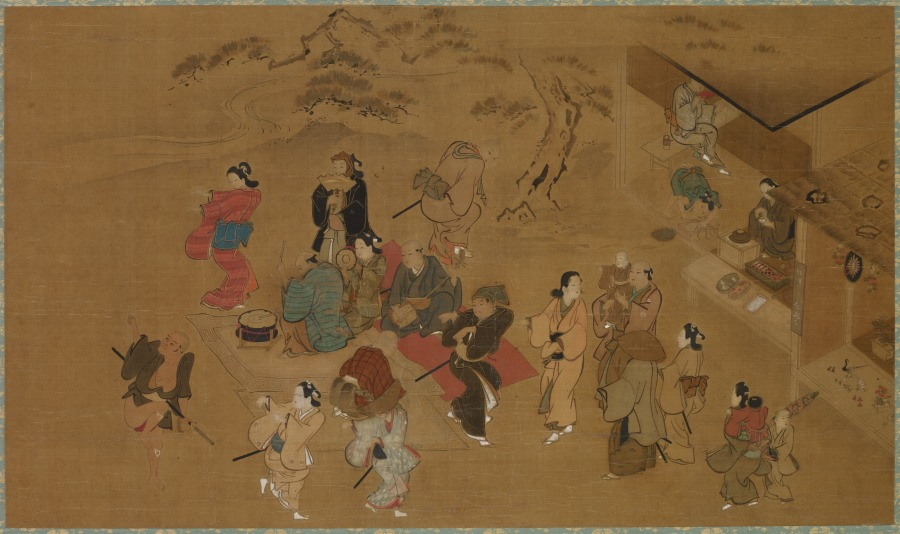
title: Spring Dance Scene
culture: Japan, Edo period (1615–1868)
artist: attributed to Hishikawa Moronobu (Japanese, c. 1618–1694)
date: mid- to late 1600s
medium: hanging scroll; ink and color on silk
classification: Painting